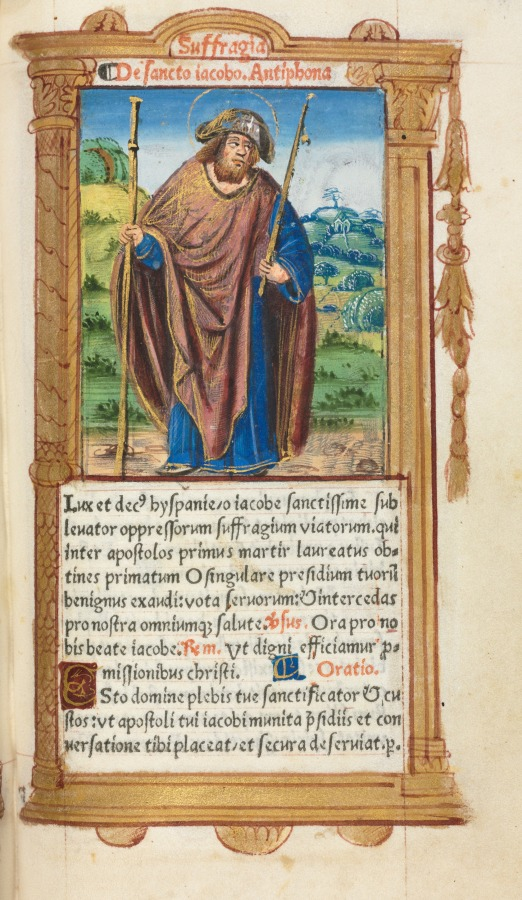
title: Printed Book of Hours (Use of Rome): fol. 100r, St. James the Greater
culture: France, Paris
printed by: Guillaume Le Rouge (French, Paris, active 1493–1517)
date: 1510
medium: 112 Printed folios on parchment, bound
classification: Bound Volume